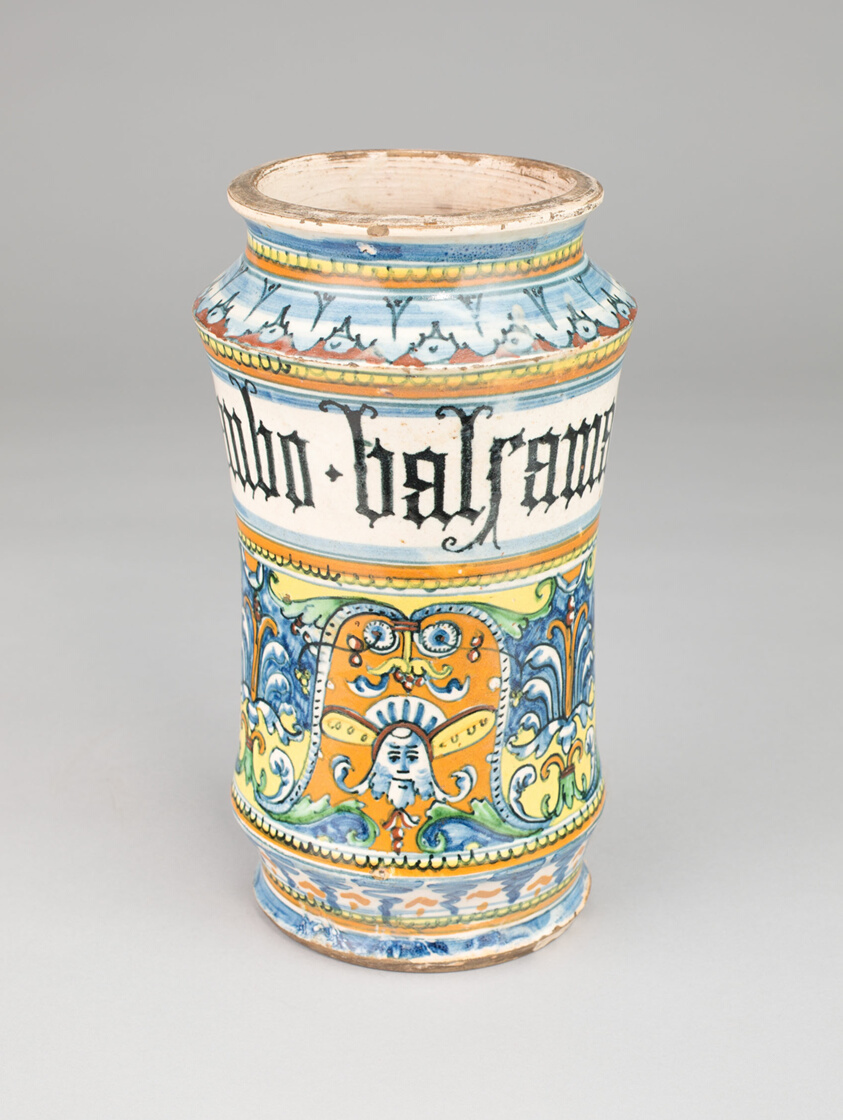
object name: Ceramics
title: Drug Jar (Albarello)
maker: Siena, Italy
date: c. 1515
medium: Tin-glazed earthenware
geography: Siena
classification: earthenware; european decorative arts; ceramics; decorative arts